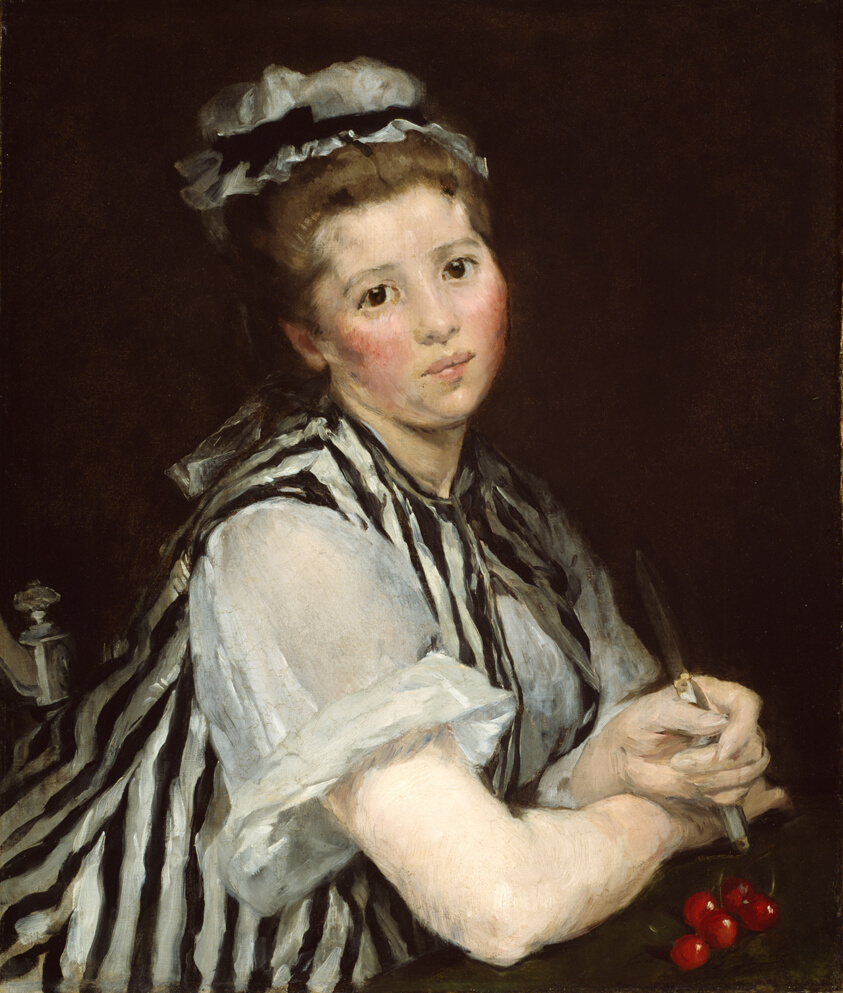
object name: Painting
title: Girl with Cherries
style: nineteenth century, 19th century, Impressionism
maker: Eva Gonzalès (French, 1849–1883)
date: c. 1870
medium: Oil on canvas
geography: France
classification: painting; paint; oil paintings (visual works); oil on canvas; french; european painting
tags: girl, berries, cherries, fruit, headdresses, portrait, portraits, portraits: female subject, stripes, women